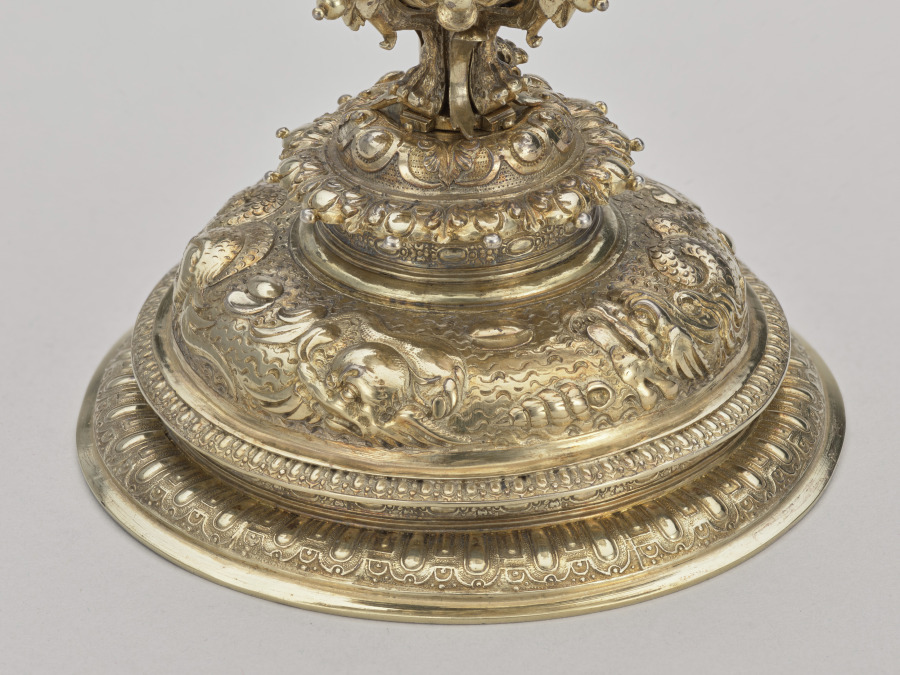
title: Nautilus Cup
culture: Netherlands, Holland, Delft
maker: Cornelis Jansz van der Burch (Dutch, active in Delft, d. 1615)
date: 1607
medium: Silver-gilt, nautilus shell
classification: Metalwork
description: Nautilus shells were brought to the Netherlands from Indonesia. Skilled Dutch silversmiths mounted them in silver, creating luxurious vessels that were sought after by wealthy collectors. Early Dutch nautilus cups are mainly associated with the city of Delft, although only a few other examples made in Delft are known from the late sixteenth and early seventeenth centuries. They feature the dramatic motif of a sea monster’s head.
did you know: The nautilus is a marine mollusk that swims by expelling water from its shell using jet propulsion.